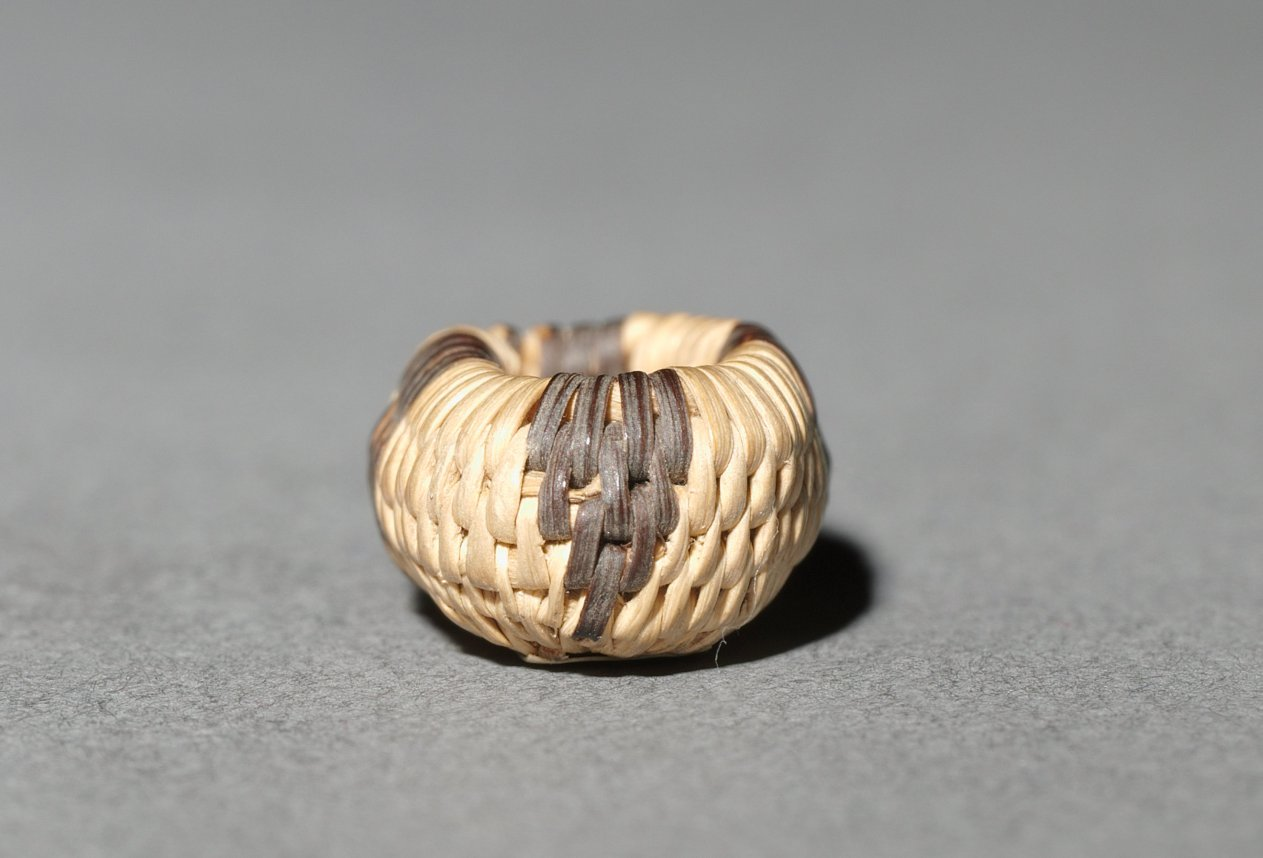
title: Miniature Basket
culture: America, Native North American, Southwest, Arizona, Akimel O'odham (Pima), Unassigned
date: before 1923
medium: plant fiber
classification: Basketry